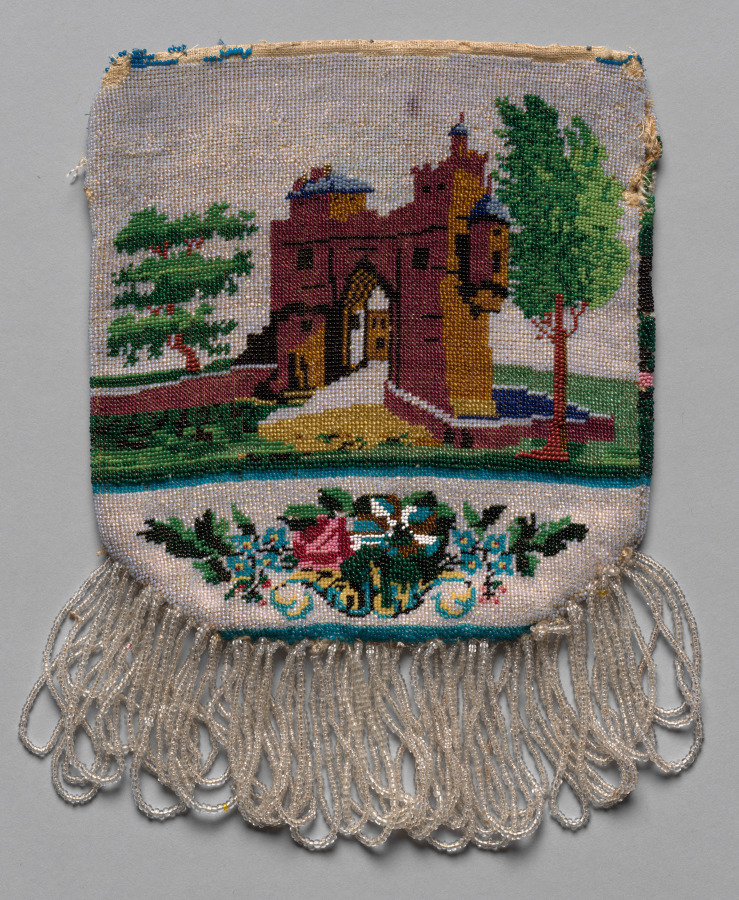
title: Beaded Bag (landscape scene)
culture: America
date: 19th century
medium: glass beads stitched individually to plain weave background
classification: Garment